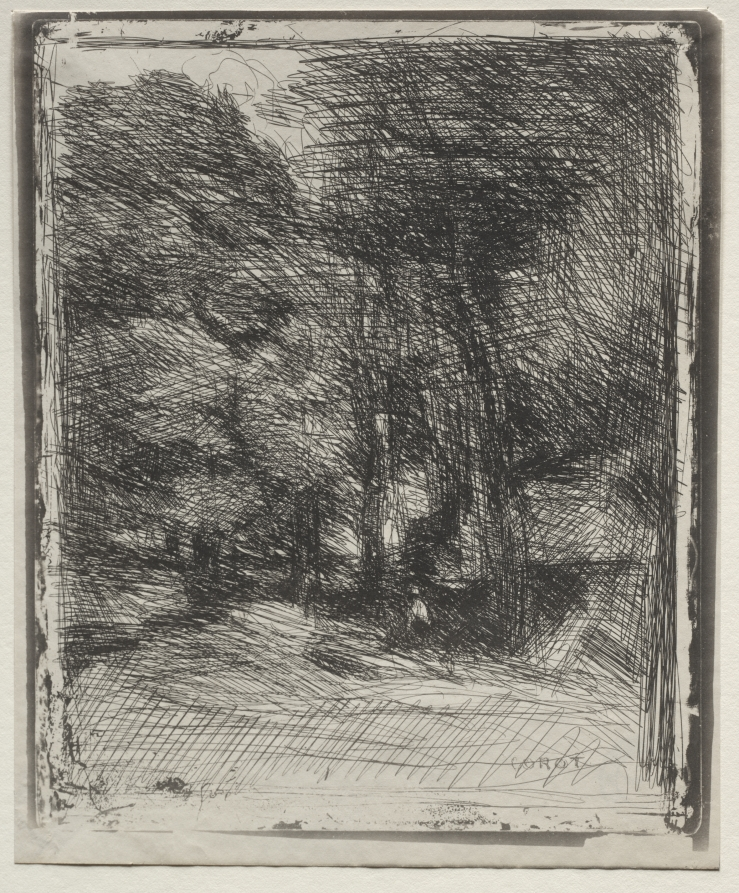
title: A Souvenir of the Bas-Bréau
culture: France, 19th century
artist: Jean Baptiste Camille Corot (French, 1796–1875)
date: original impression 1858, printed in 1921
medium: cliché-verre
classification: Print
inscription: signed, lower right: "COROT" in glass plate